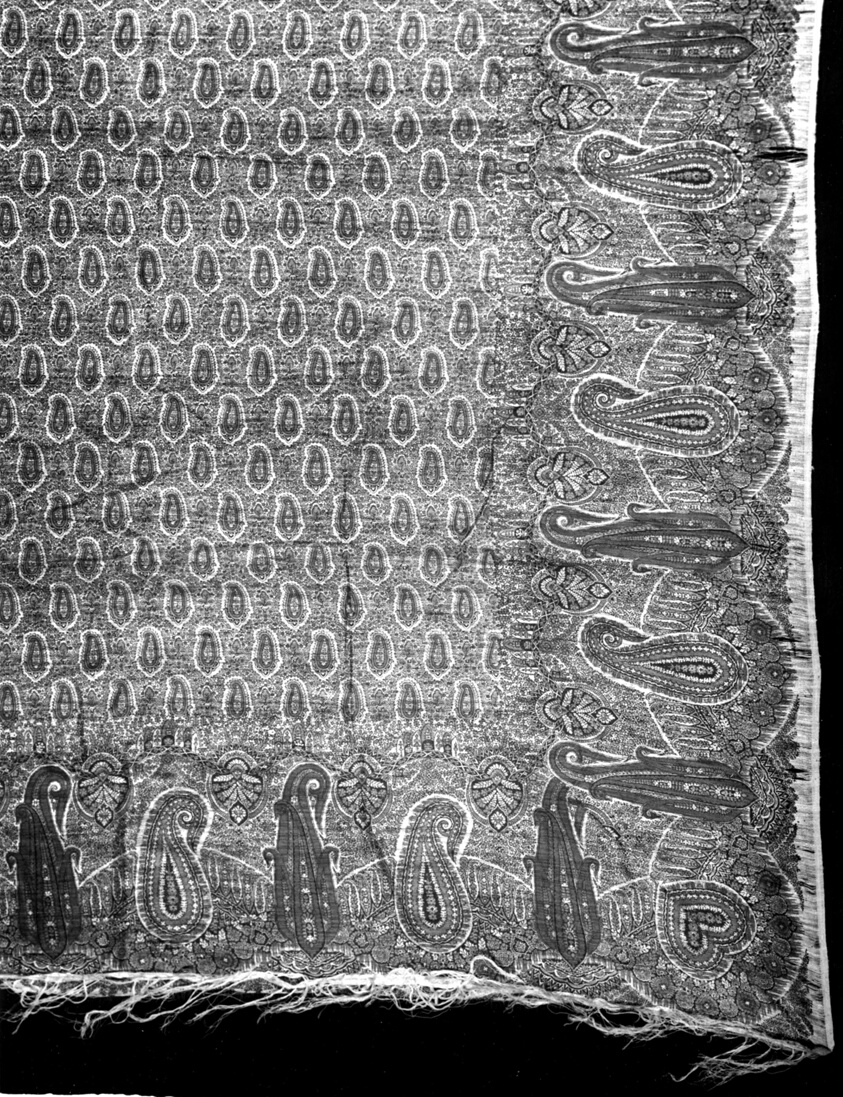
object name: Textile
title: Long Shawl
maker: Possibly England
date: 1855/60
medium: Silk, gauze weave; block printed; attached knotted fringe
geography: England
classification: textile; weaving - printed